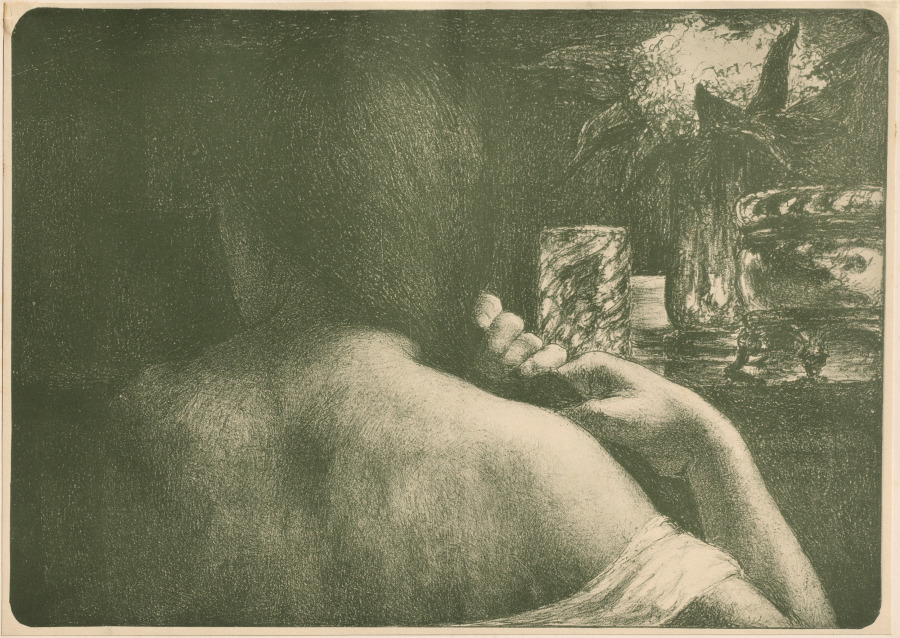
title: La Chevelure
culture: France, Paris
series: L'Estampe Moderne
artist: Jules Léon Flandrin (French, 1871–1947)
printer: Imprimerie Champenois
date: 1899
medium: Color lithograph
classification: Bound Volume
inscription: upper right corner of secondary support: blindstamp of l'Estampe Moderne (Lugt 2790)